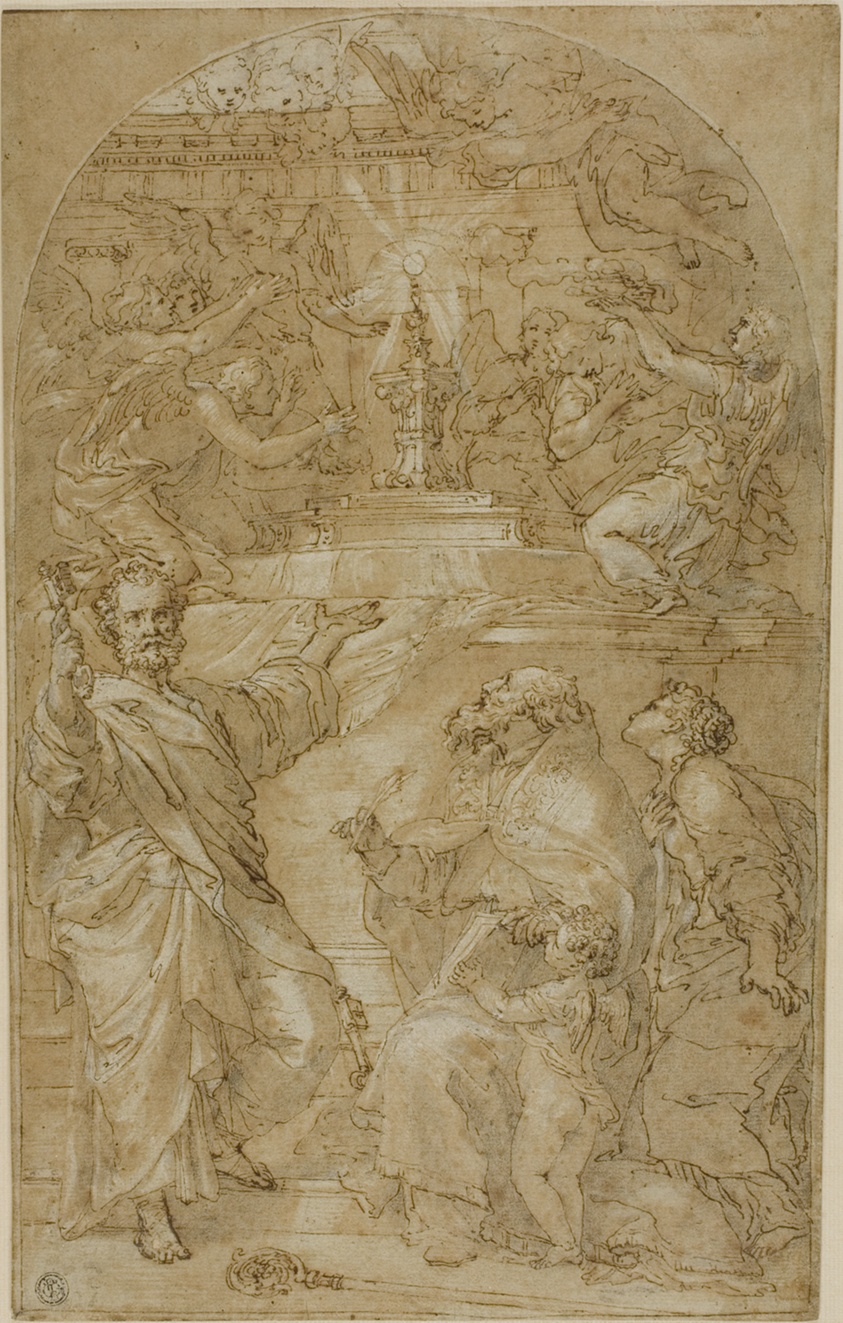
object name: Drawing and Watercolor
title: Saint Peter, Saint Augustine and a Female Saint in Adoration of the Eucharist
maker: Unknown Artist; Italian, 17th century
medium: Pen and brown ink, with brush and brown wash, heightened with white gouache, over black chalk, on blue gray laid paper, laid down on cream laid paper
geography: Italy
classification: pen and ink drawings; drawings (visual works); prints and drawing